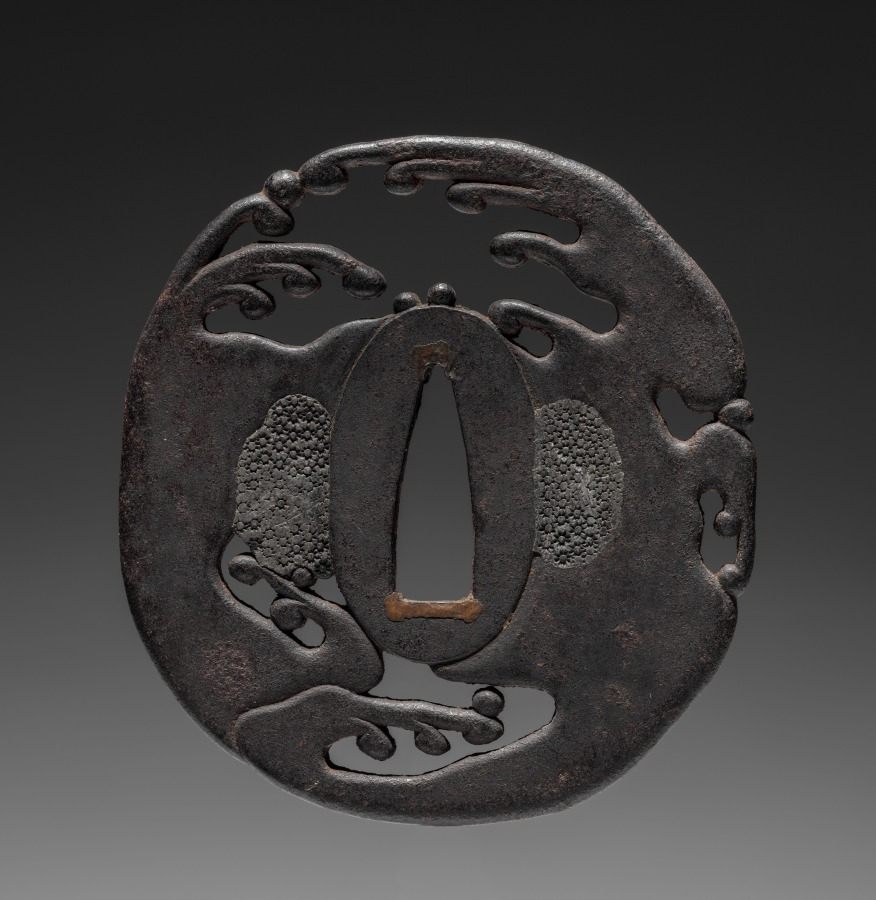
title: Sword Guard (Tsuba) with Rough Waves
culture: Japan, Edo period (1615–1868)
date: 1615–1868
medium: iron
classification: Arms and Armor